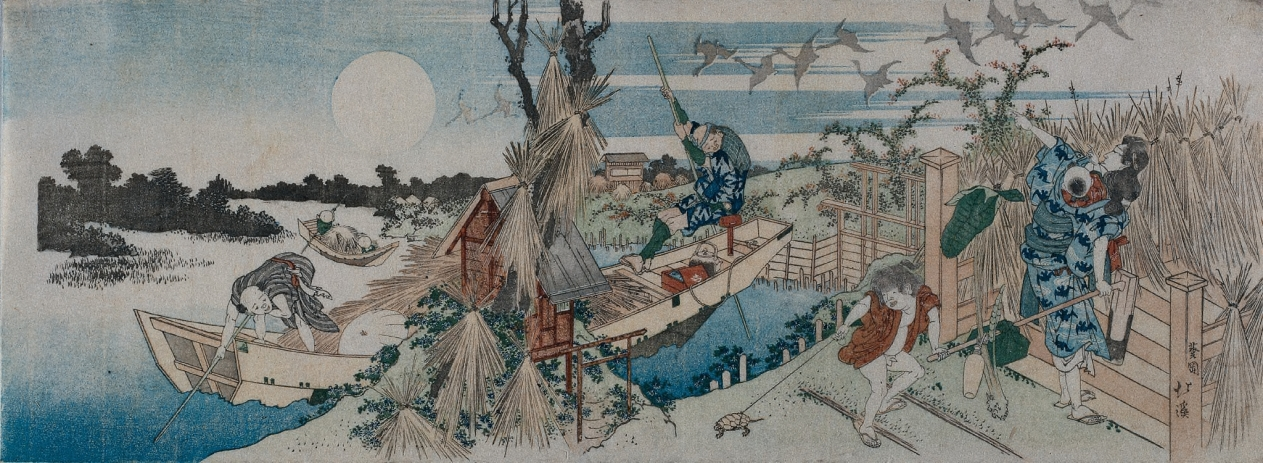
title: Landscape with Ferry Boat, Geese and Full Moon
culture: Japan, Edo period (1615–1868)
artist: Totoya Hokkei (Japanese, 1780–1850)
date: early 1830s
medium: color woodblock print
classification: Print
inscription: Signature: Aoigaoka Hokkei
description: This scene, of men in boats gathering reeds on a lake while geese fly in the moonlit sky, tells us that autumn in the air.